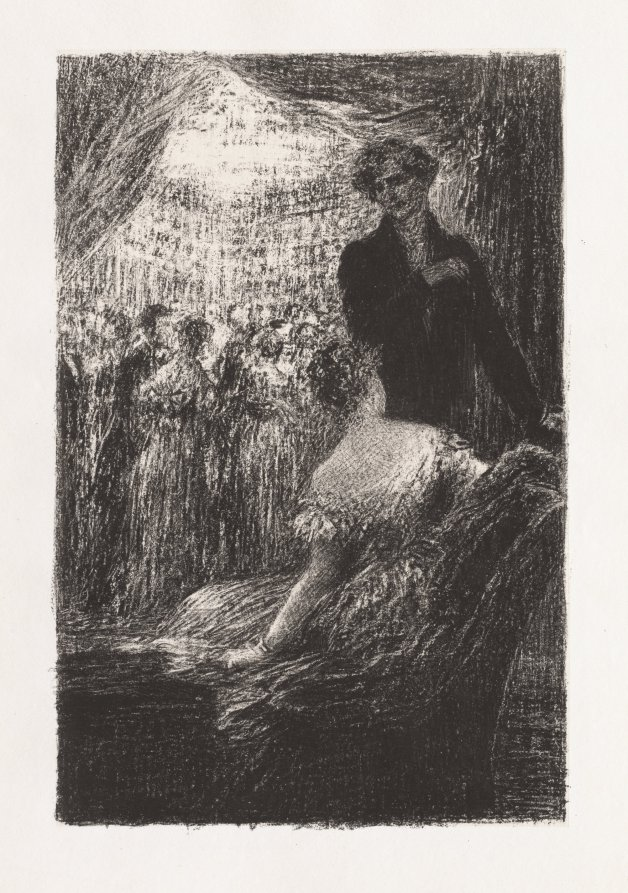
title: Fantastic Symphony: A Ball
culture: France, 19th century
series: Hector Berlioz: His Life and Work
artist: Henri Fantin-Latour (French, 1836–1904)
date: 1888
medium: lithograph on chine collé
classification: Print